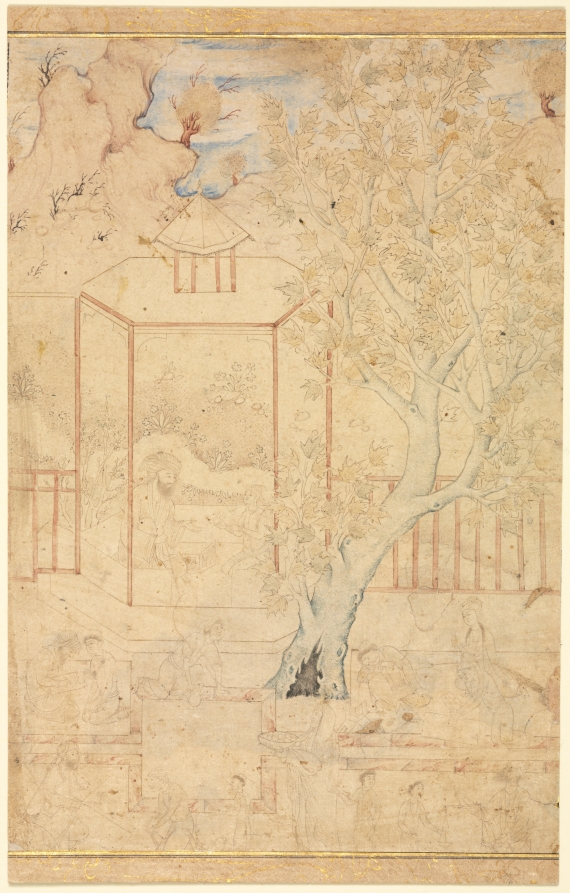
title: Garden Scene with a Master Instructing a Student in a Pavilion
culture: Iran, Qazvin, Safavid period (1501-1722)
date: c. 1570–1590s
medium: opaque watercolor and ink on paper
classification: Drawing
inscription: script: none